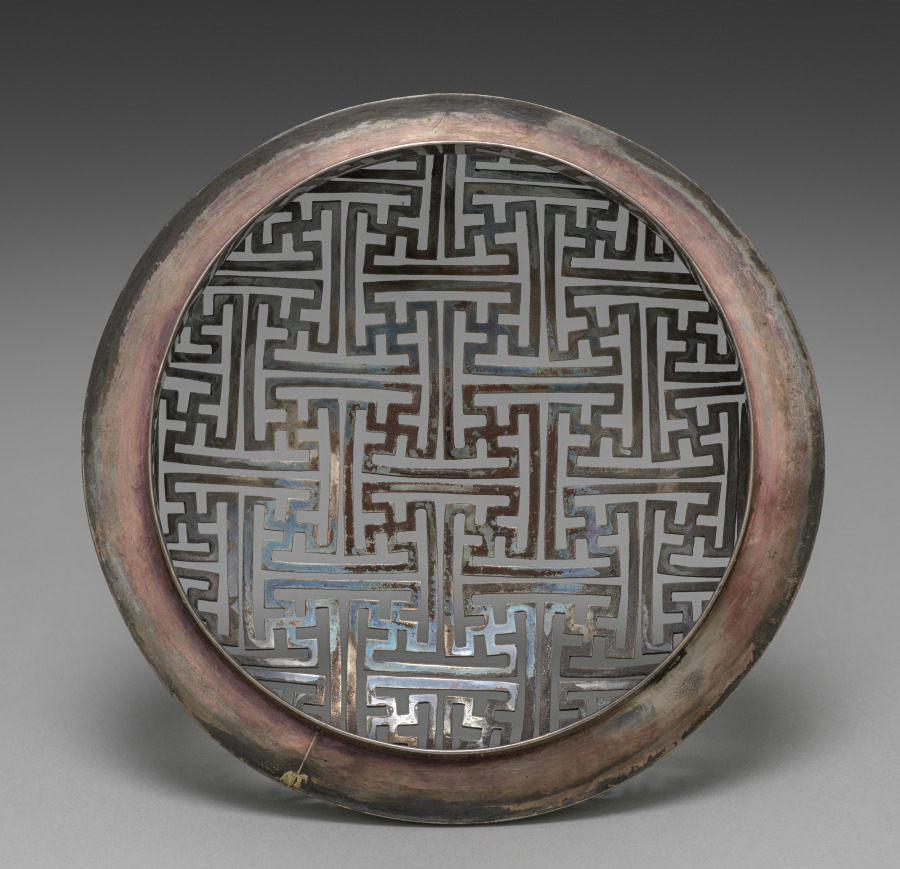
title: Lid for an Incense Burner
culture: Japan, Meiji period (1868–1912)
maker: Seifū Yohei III (Japanese, 1851–1914)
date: 1895–1914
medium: Geometric openwork silver lid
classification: Ceramic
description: Kyoto-based Japanese ceramist Seifū Yohei III (1851–1914) admired the glaze colors found on Chinese porcelain and tried to replicate them through intensive experimentation. His green and creamy white glazes were particularly well received. The combinations of colors with subtle molded and incised decorations in his ceramics respond powerfully to changes in light, creating a dynamic viewing experience. Names for the glazes, written in ink with a brush on the lids of the custom-made storage boxes for the works, often indicate a specific glaze or ware that had inspired him, even when the resulting color was distinctively his own.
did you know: The silver lid was produced outside the studio by metalwork specialists.